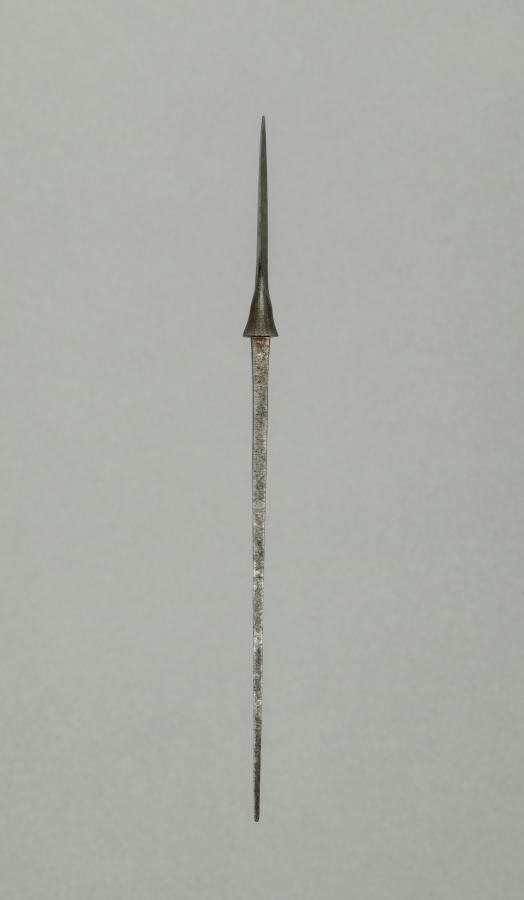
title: Arrow Point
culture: Japan, Edo period (1615–1868)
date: 1700s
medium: steel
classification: Arms and Armor